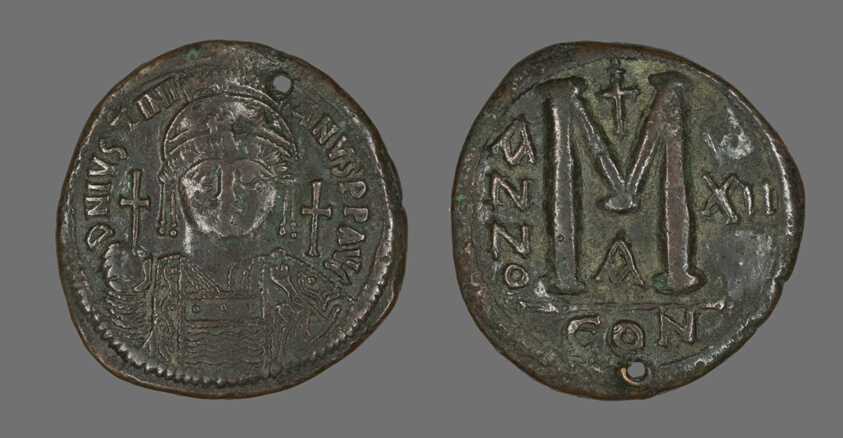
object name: Coin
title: Follis (Coin) Portraying the Emperor Justinian I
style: byzantine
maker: Byzantine, minted in Constantinople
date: 538-539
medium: Bronze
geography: Istanbul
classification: coin; ancient art